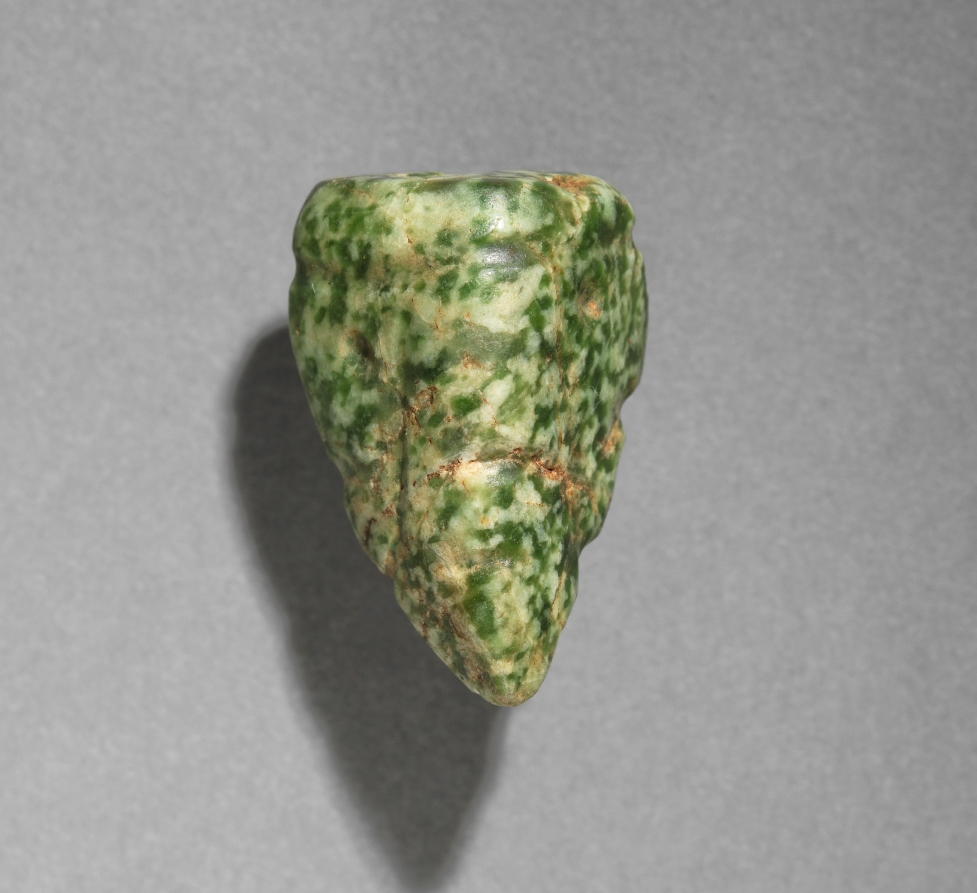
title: Head Pendant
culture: Mesoamerica, Mexico, Guerrero, Mezcala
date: 100 BCE–300 CE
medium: polished green stone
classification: Sculpture